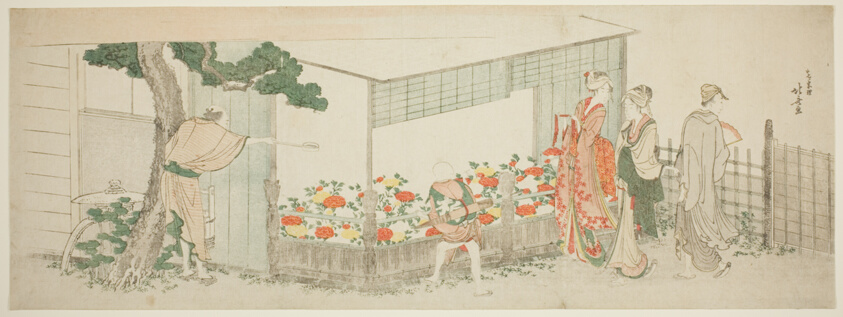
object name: Print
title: The Peony Show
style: Japanese (culture or style)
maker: Katsushika Hokusai 葛飾 北斎; Japanese, 1760-1849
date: c. 1799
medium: Color woodblock print; ebangire, surimono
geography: Japan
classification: woodblock print; print; asian art